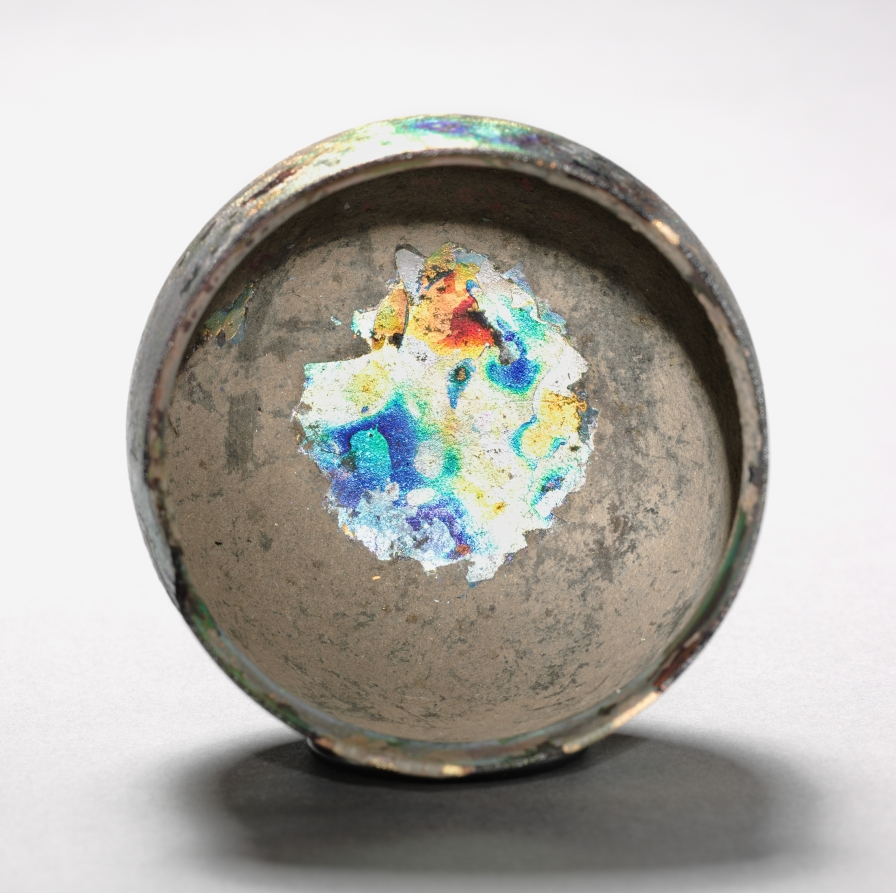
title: Goblet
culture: Italy, Roman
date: 100–300 CE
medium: glass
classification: Glass